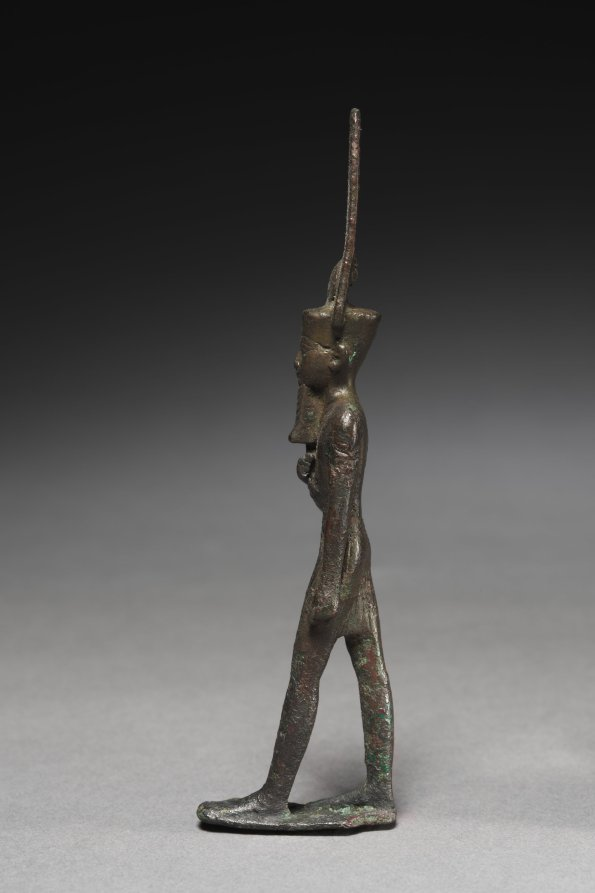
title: Statuette of Amen-Ra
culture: Egypt, Late period (715–332 BCE), Dynasty 26 or later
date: 664–525 BCE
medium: bronze, solid cast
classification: Sculpture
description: In this statue of Amen-Ra, the principal deity of the ancient Egyptian city of Thebes, his sun disk and double plume crown (here viewable as partial remains) represent his mystical powers, such as bringing light to the sky. In the Rick Owens ensemble, a light bulb helmet is reminiscent of the physical and mythological characteristics of Amen- Ra’s double plume crown. After a trip to Egypt, Owens designed his fall 2022 men’s collection, which centered around symbols associated with ancient Egyptian deities, playing into the mainstream mystical interest about that religion.